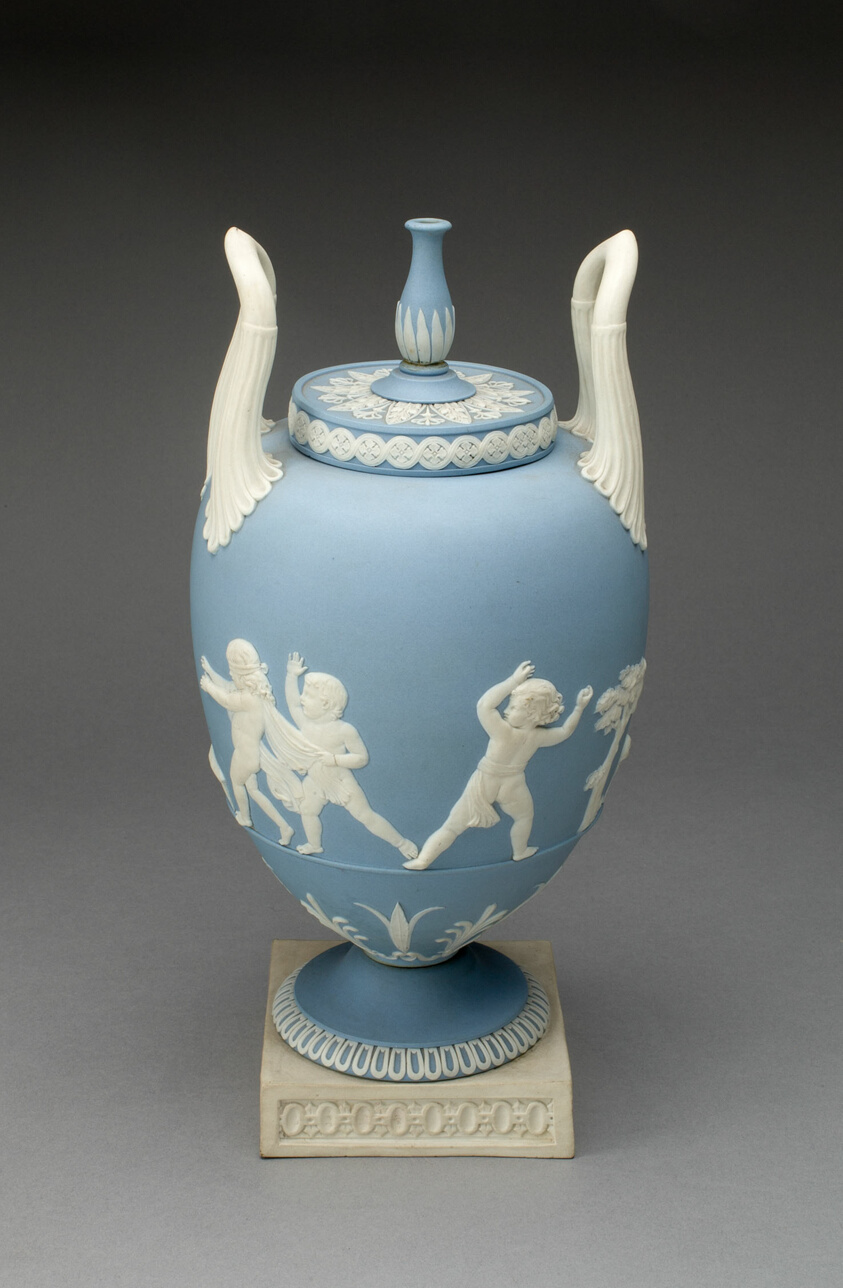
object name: Ceramics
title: Flower Holder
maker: Wedgwood Manufactory (England, founded 1759)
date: c. 1790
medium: Stoneware (jasperware)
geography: Burslem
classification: ornamental piece; stoneware; european decorative arts; ceramics